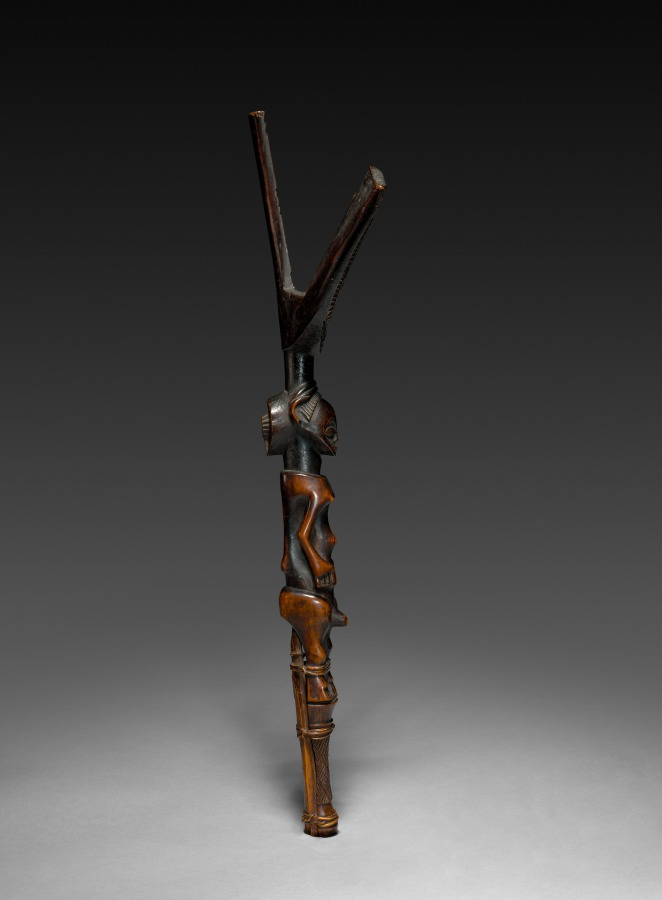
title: Bow Stand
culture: Africa, Central Africa, Democratic Republic of Congo, Luba-style carver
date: 1800s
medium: Wood and plant fiber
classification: Sculpture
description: A powerful symbol of the Luba king, bow stands were ceremonial objects that resided within the king’s private vicinity in the palace and were never displayed in public. Typically, bow stands depict a female figure, but the sculptor has carved a figure with ambiguously gendered human traits. This is a symbolic depiction that may allude to how divine rulers (mulopwe) were believed to have both “male” and “female” character traits, which allowed this sculpture to act as a vessel for spirits of any gender.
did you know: The shape of this wooden bow stand is based on a more practical version in metal used by hunters.